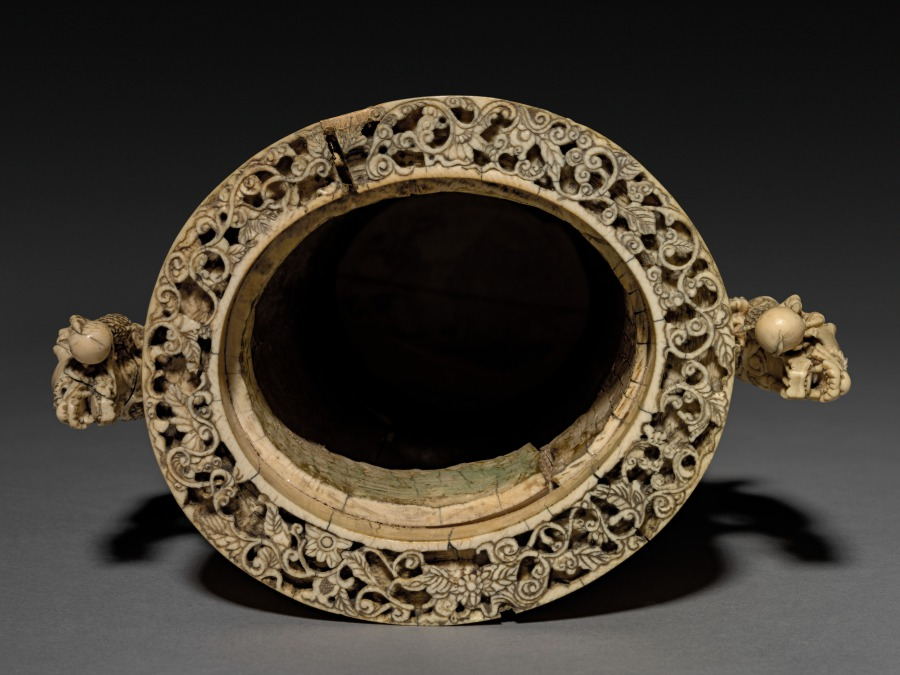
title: Carved Vase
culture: Japan, Edo period (1615–1868) to Meiji period (1868–1912)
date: 1800s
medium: ivory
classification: Ivory